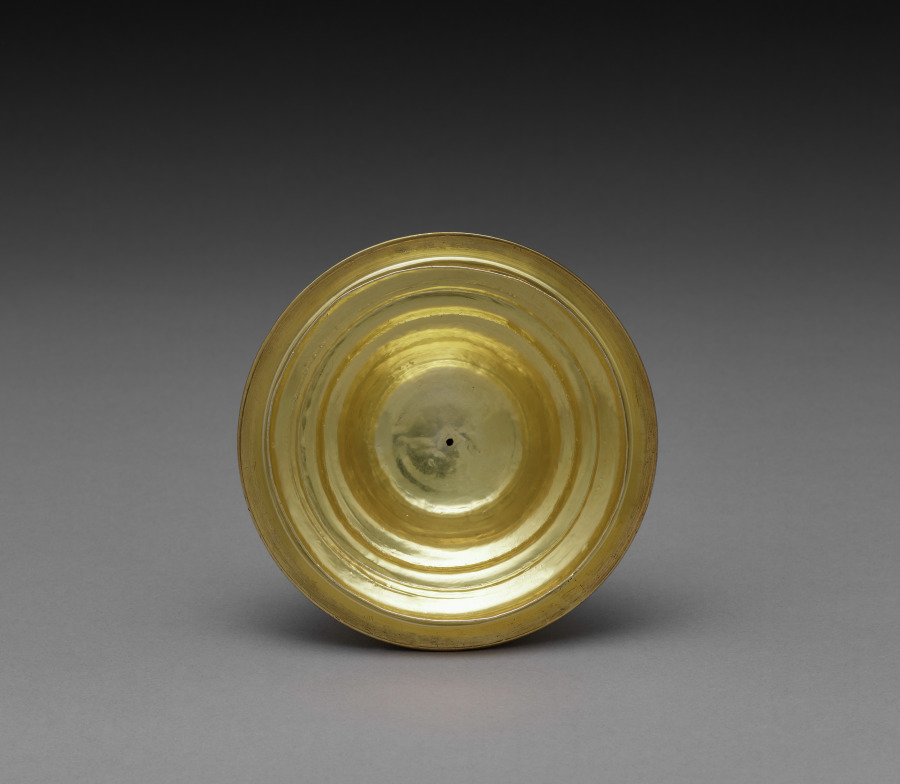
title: Covered Cup (cover)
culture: England, London, 18th century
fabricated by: Gabriel Sleath (British, 1674–1756)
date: 1723–1724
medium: silver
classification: Silver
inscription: engraved in the center of the cup is a demi-lion, rampant passant, holding an unknown object on an irregularly shaped shield surrounded by baroque manteling. In style, it is appropriate for date of cup but does not appear a true coat of arms. On the lid is a crest consisting of a demi-lion, rampant passant, between open buffalo horns. These heraldic devices perhaps refer to some entity rather than an individual.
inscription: Hallmarks stamped on lid: "G", two unidentifiable, "H".